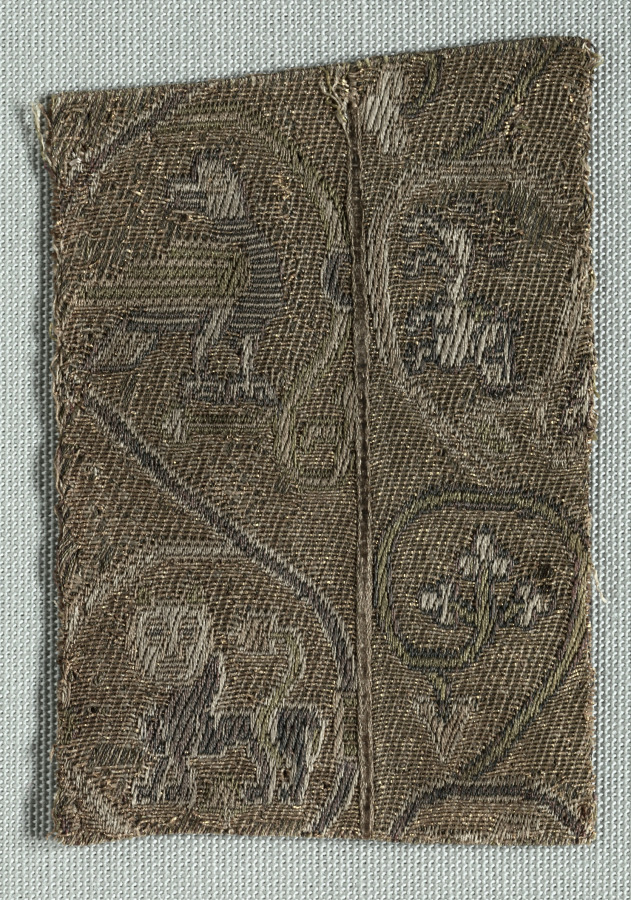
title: Fragment of a Band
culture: Italy, Sicily, Palermo, 11th-12th century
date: 1000s–1100s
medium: warp face pick up twill; silk and metal thread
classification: Textile